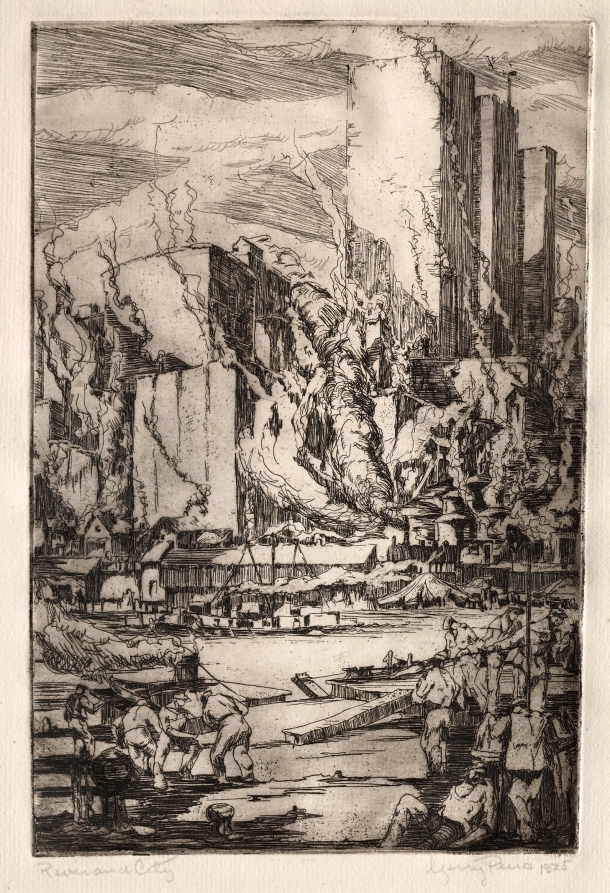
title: River and City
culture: America, Ohio, Cleveland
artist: Elbridge Gerry Peirce (American, 1900–1969)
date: 1925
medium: etching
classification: Print